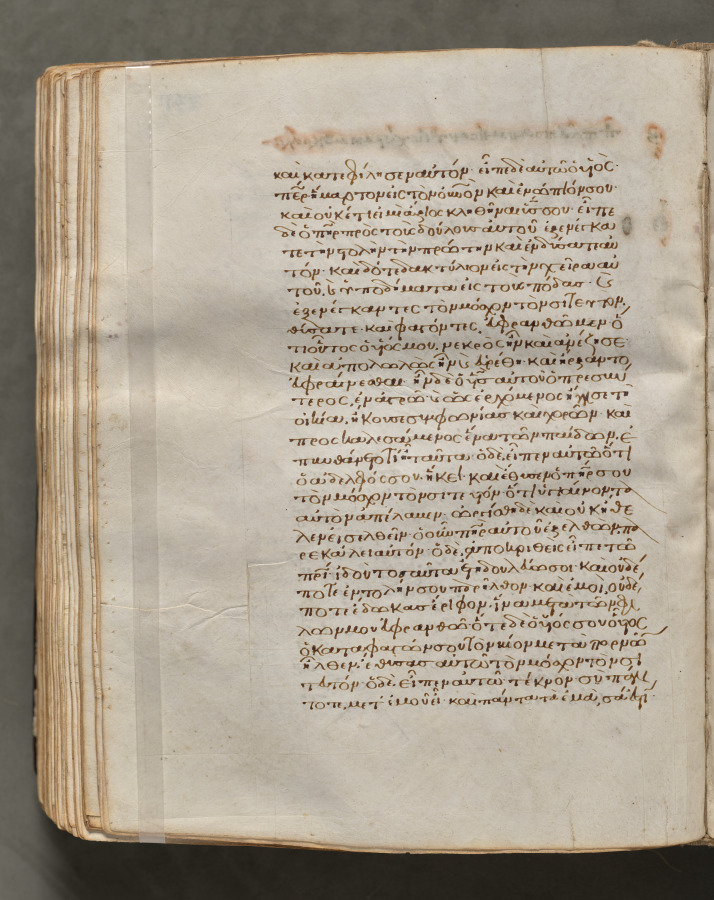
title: Text, folio 281 (verso), from a Gospel Book with Commentaries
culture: Byzantium, Constantinople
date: c. 1000–1100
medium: ink, tempera, and gold on vellum; leather binding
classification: Bound Volume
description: Each of the four gospels in this book opens on a page with brilliantly illuminated borders depicting the author of the text as well as birds—principally peacocks, symbols of the immortality of the soul—and fountains, representing the fountain of life and the salvation of the soul. This volume consists of 428 leaves with texts in Greek. Its level of sophistication suggests that it was probably written and decorated in a monastery in Constantinople.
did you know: Gospel books were carried in procession through Byzantine churches.